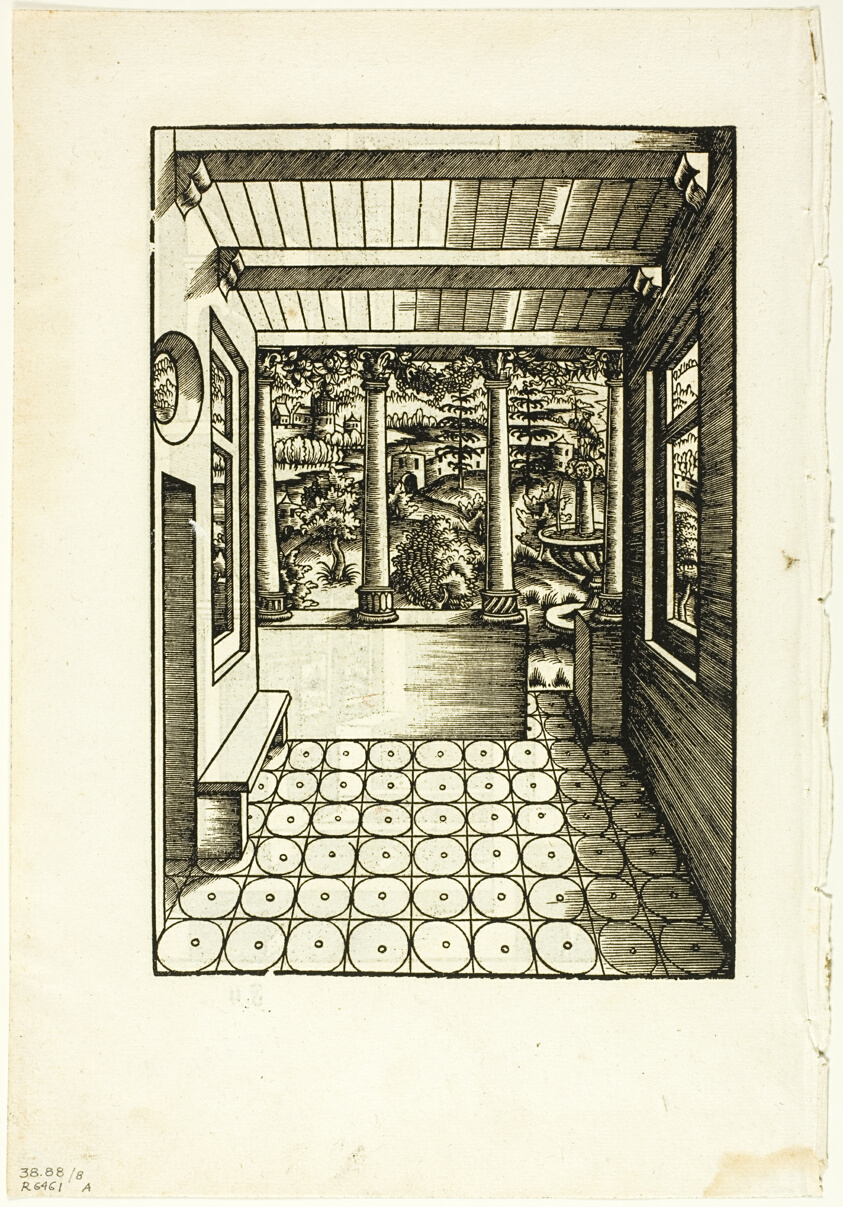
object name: Print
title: Illustration from Kunst des Messens (The Art of Measurement), plate eight from Woodcuts from Books of the XVI Century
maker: Attributed to Monogrammist H.H. (German, active 1539-1559); assembled by Max Geisberg (Swiss, 1875-1943)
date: 1531, assembled into portfolio 1937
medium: Woodcut on paper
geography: Germany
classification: woodcut; print; prints and drawing